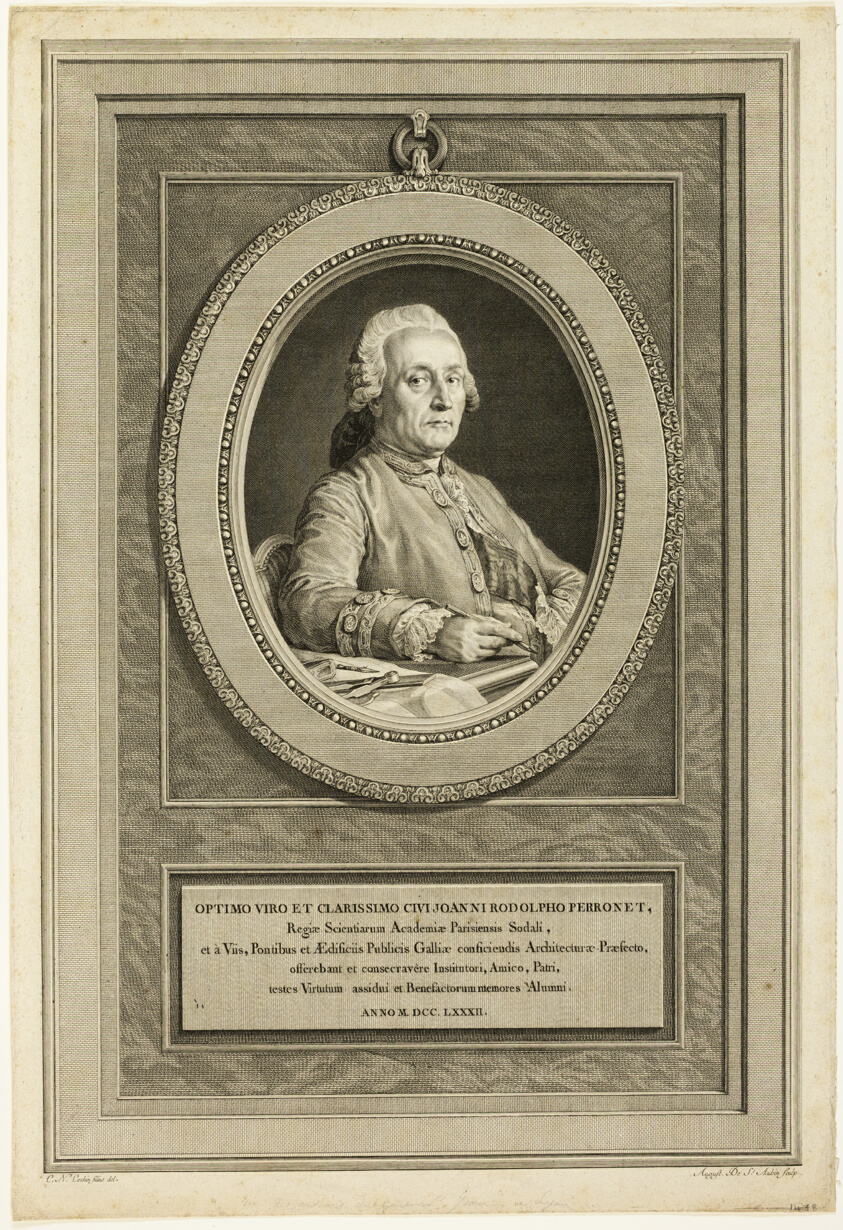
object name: Print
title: Portrait of J.R. Perronet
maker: Augustin de Saint-Aubin (French, 1736-1807); after Charles-Nicholas Cochin, the younger (French, 1715-1790)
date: 1782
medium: Engraving on paper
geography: France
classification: engraving; print; prints and drawing